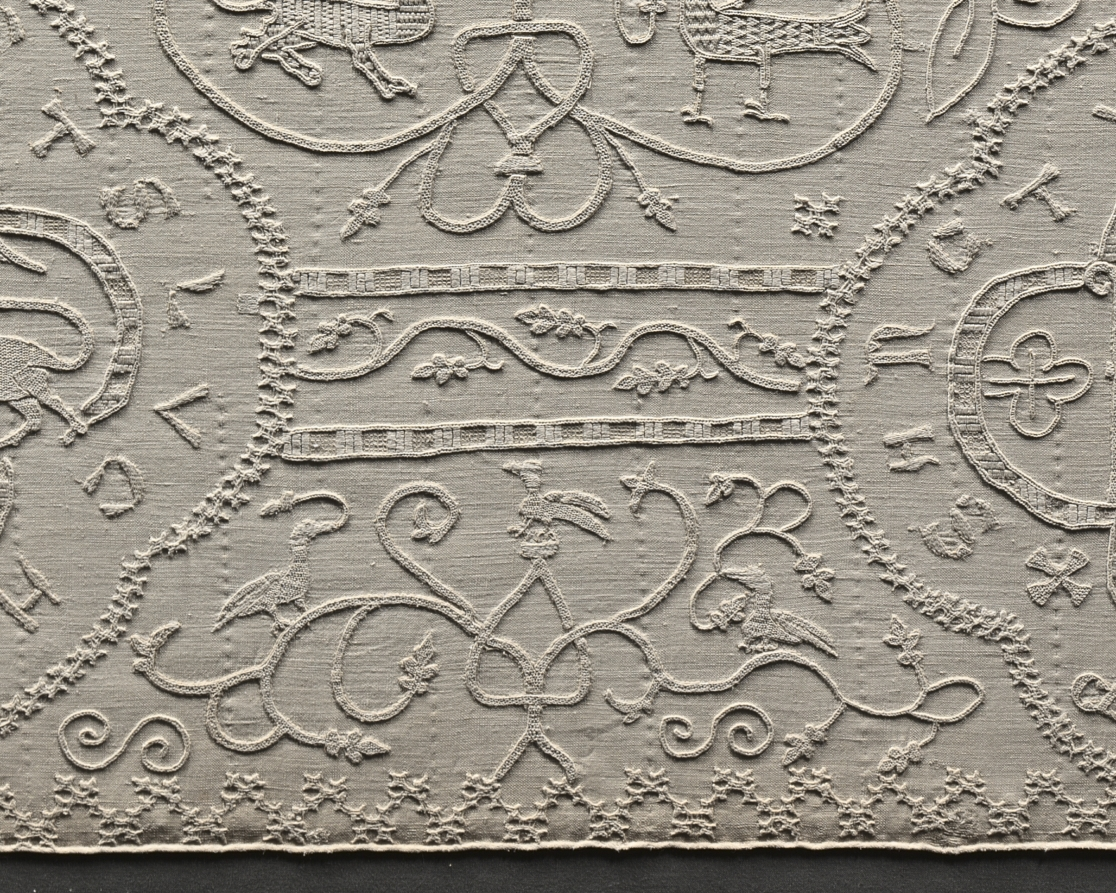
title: Altar Cloth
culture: Germany, Altenberg on the Lahn, Premonstratensian Convent, 14th century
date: c. 1350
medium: embroidery: linen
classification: Embroidery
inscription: various motifs enclosed in quatrefoils with identifying inscriptions in Gothic letters.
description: This large, embroidered altar cloth is one of the rarest, most important medieval church furnishings in existence. It was stitched by nuns in the Premonstratensian Convent in Altenberg on the Lahn River, north of Frankfurt, Germany, and was used to cover the church’s high altar in the weeks leading up to Easter. The cloth is an example of linen embroidery, a specialty of German nuns in the later Middle Ages. The Altenberg monastery church once had valuable furnishings; the high altar retable (a decorated frame with sculptures and paintings on the top of an altar) has survived, the main parts of which are now in the Städel Museum in Frankfurt, Germany.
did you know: When lit from behind, the previously hidden details emerge and the complex design becomes evident.